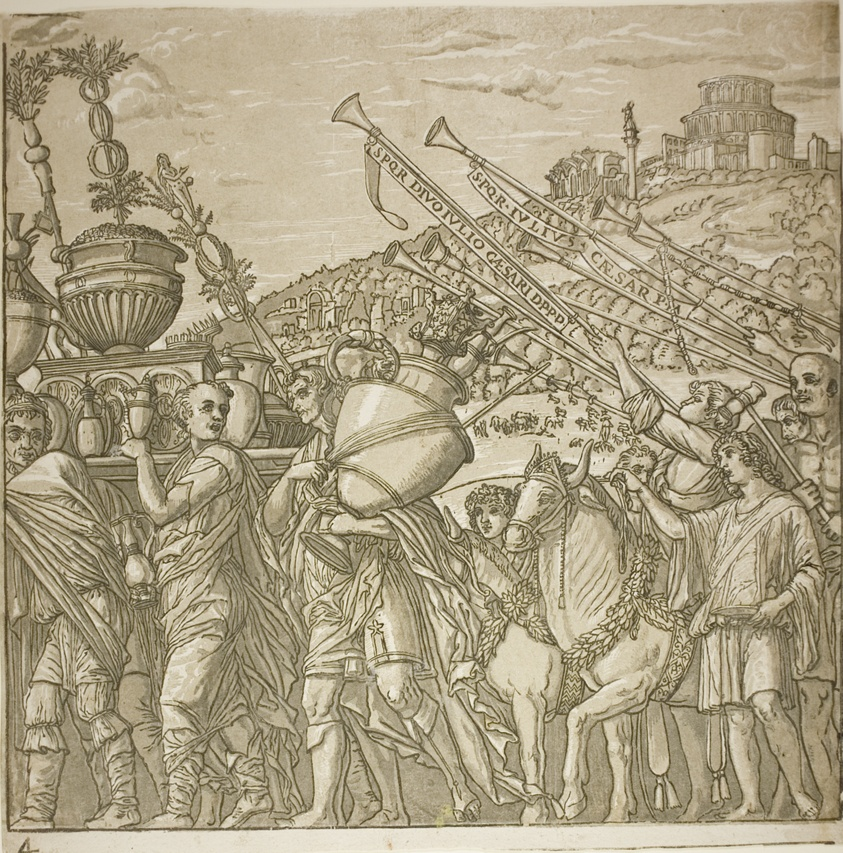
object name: Print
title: Triumph of Caesar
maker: Andrea Andreani (Italian, 1558/59–1629); after Andrea Mantegna (Italian, 1431–1506)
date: 1599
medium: Chiaroscuro woodcut from four blocks in black and light, medium and dark warm gray on off-white laid paper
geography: Italy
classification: chiaroscuro woodcut; woodcut; print; prints and drawing